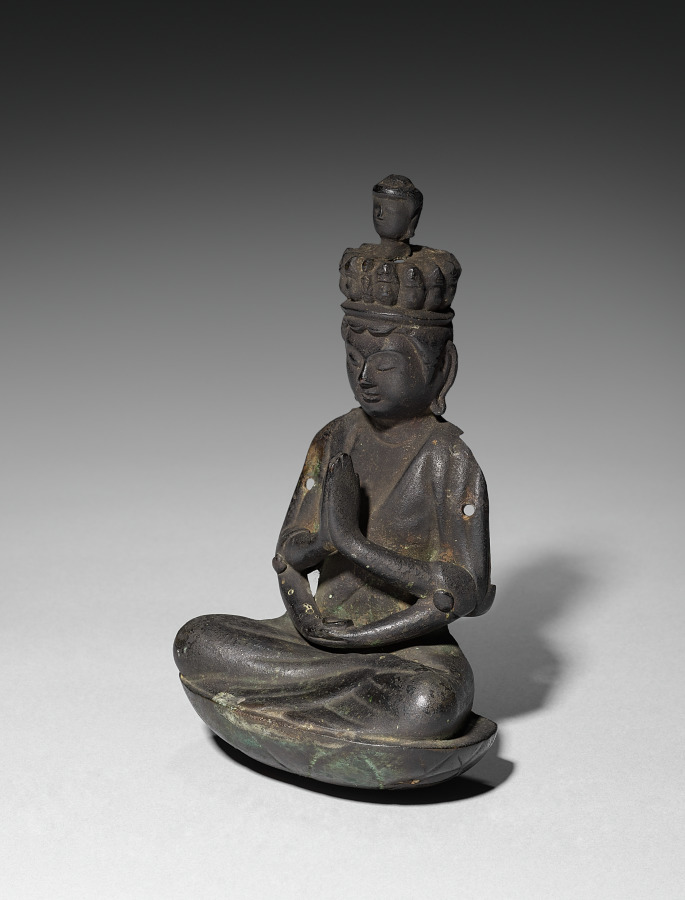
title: Eleven-Headed Kannon (Jūichimen Kannon)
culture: Japan, Heian period (794–1185) to Kamakura period (1185–1333)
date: 1100s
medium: bronze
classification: Sculpture